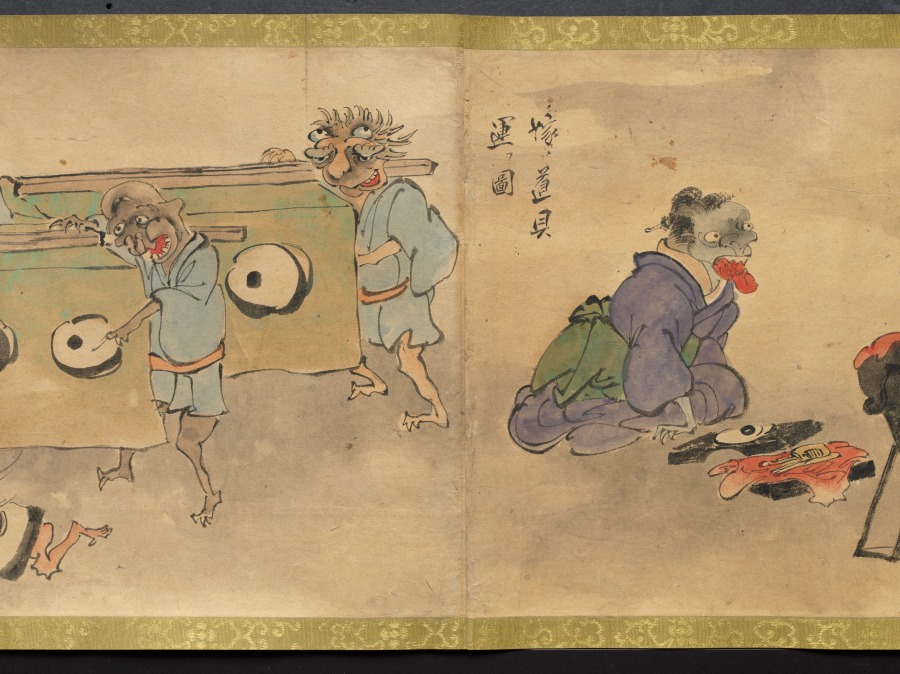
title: An Illustrated Marriage of Apparitions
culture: Japan, Edo period (1615–1868)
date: mid-1800s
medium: handscroll; ink and color on paper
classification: Painting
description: The matchmaking, engagement, wedding, and birth of the first child of two apparitions, or bakemono, literally "things that change," are illustrated in this whimsical, humorous handscroll. Japanese folklore abounds with such strange creatures, most famously represented in handscrolls featuring a procession of 100 supernatural monsters. Aside from a textual preface and cartouches indicating the content of the scenes, the tale is told visually. The artist and whereabouts of the original handscroll are unknown, but a number of other 19th-century copies by amateur painters exist in Japanese collections, attesting to its broad appeal.